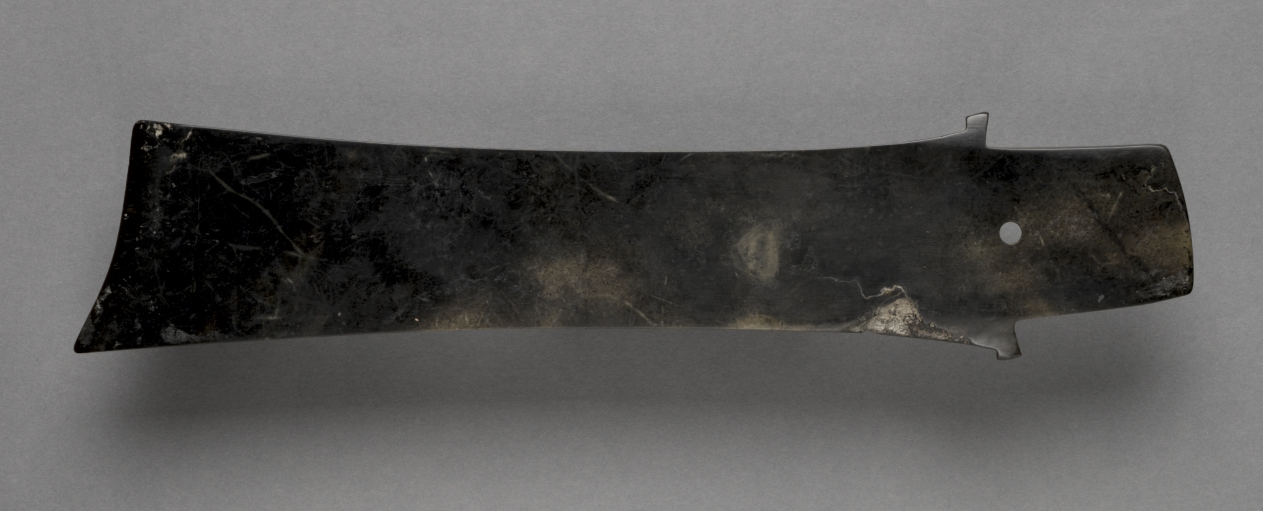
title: Zhang (Ceremonial Blade)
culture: China, Neolithic period (3000s–2000s BCE) to Shang dynasty (c. 1766–1045 BCE)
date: c. 2500–1500 BCE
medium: nephrite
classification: Jade